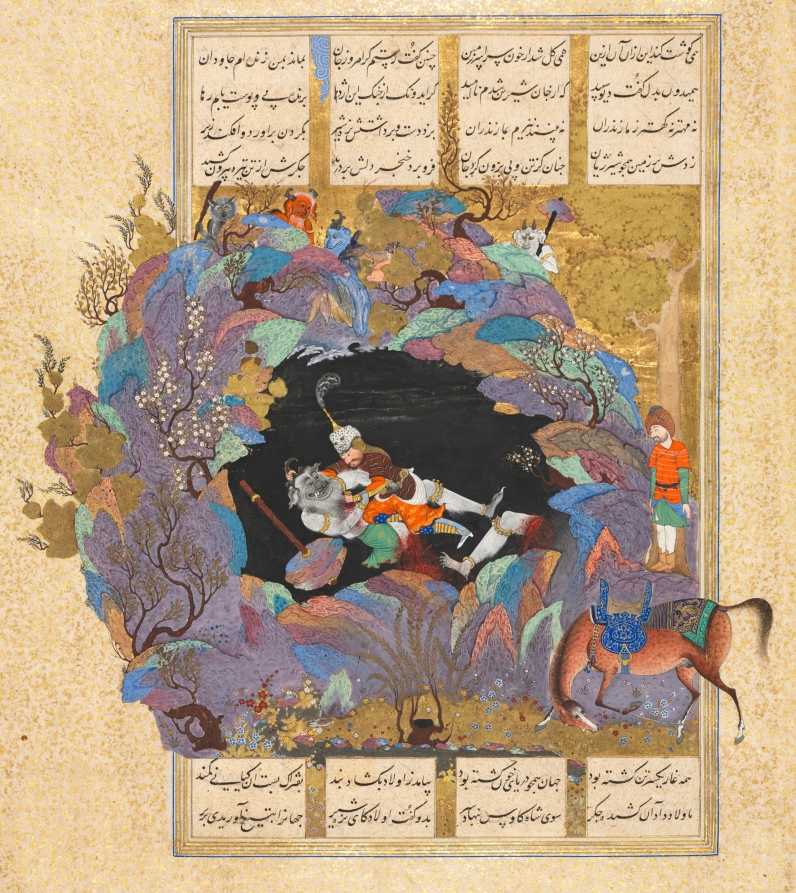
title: Rustam's seventh course: He kills the White Div, folio 124 from a Shah-nama (Book of Kings) of Firdausi (Persian, about 934–1020)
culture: Iran, Tabriz, Safavid period (1501-1722)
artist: attributed to Abd al-Vahhab (Persian, active about 1516)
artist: attributed to Mir Musavvir (Iranian, c. 1510–1555)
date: 1522–37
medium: Gum tempera, ink, gold, and silver on paper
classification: Manuscript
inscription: Script: Nasta'liq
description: The legendary hero Rustam brutally takes the demon chief’s liver blood, needed to cure his king of blindness. Paintings from the Shah-nama made for the Persian ruler Shah Tahmasp (reigned 1524–76) were acclaimed in their day for their brilliant coloring and refinement. Seven of the artists who contributed to this book moved to India to lead the new Mughal painting workshop in the 1550s. They introduced to the Indian artists a more complex color sensibility and preference for presenting faces in three-quarter view, as opposed to in profile.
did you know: Devils in the details: three peer into the White Div’s lair by the Caspian Sea.